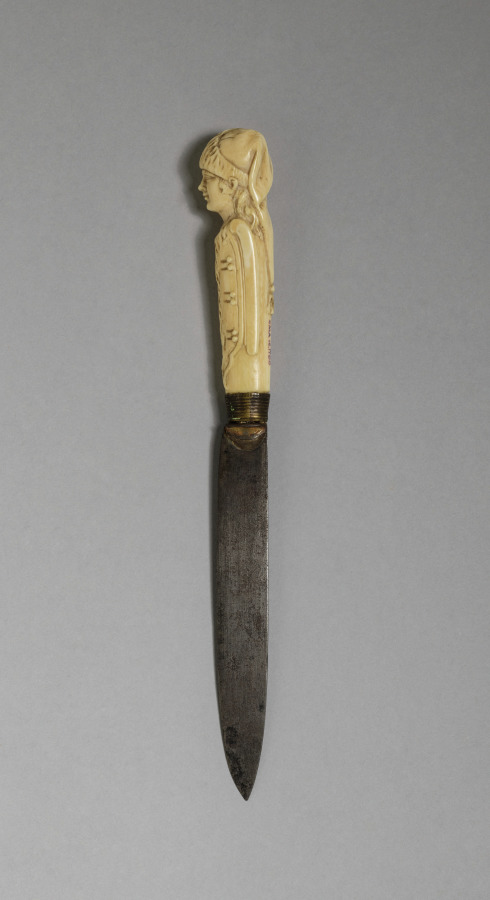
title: Knife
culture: Italy, 18th century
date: 1700s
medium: metal blade, ivory handle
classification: Ivory